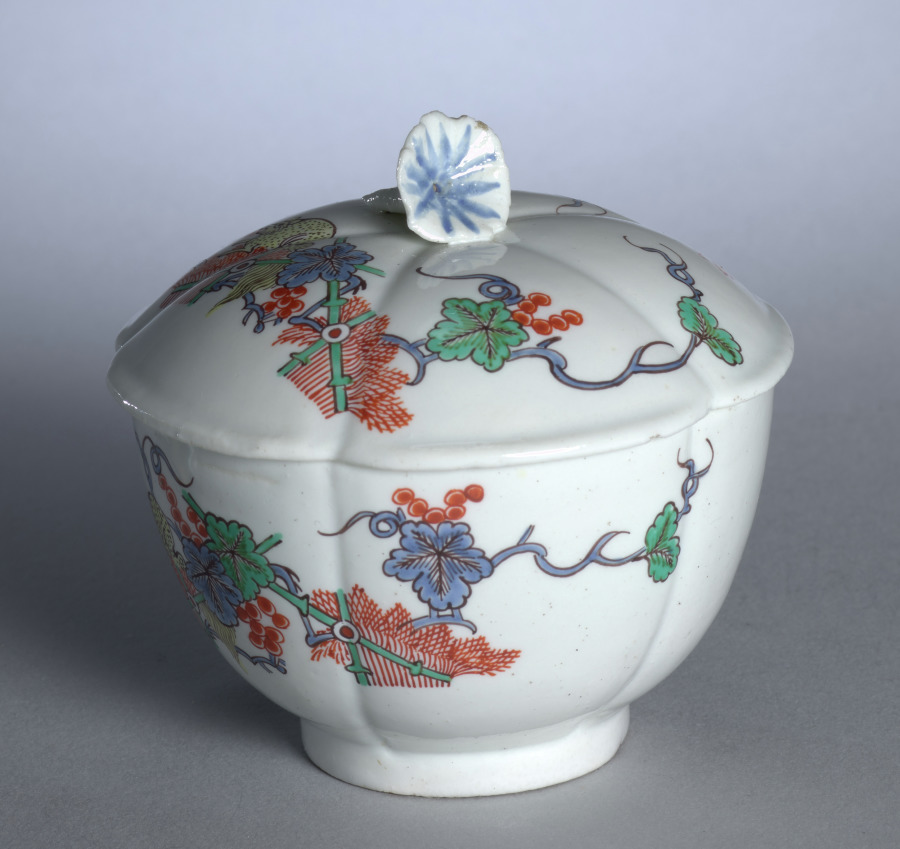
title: Sugar Bowl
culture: France, Chantilly, 18th century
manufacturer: Chantilly Porcelain Factory (French)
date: c. 1730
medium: soft-paste porcelain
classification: Ceramic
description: The pieces composing this individual tea set are entirely typical of Chantilly soft-paste porcelain in the Kakiemon style. Both the form and decoration of these pieces were inspired by Japanese prototypes. The use of knobs in the form of trumpet-shaped blossoms is characteristic of Chantilly wares.